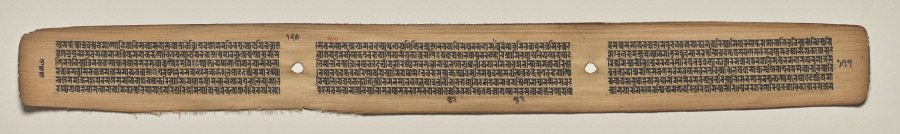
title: Text, Folio 127 (verso), from a Manuscript of the Perfection of Wisdom in Eight Thousand Lines (Ashtasahasrika Prajnaparamita-sutra)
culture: Eastern India, Bihar, Vikramashila Monastery. Painting: Nepal, Kathmandu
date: Sunday, September 14, 1119 (year 239 of the Newar Samvat in the month of Ashvina)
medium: gum tempera and ink on palm leaves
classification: Painting